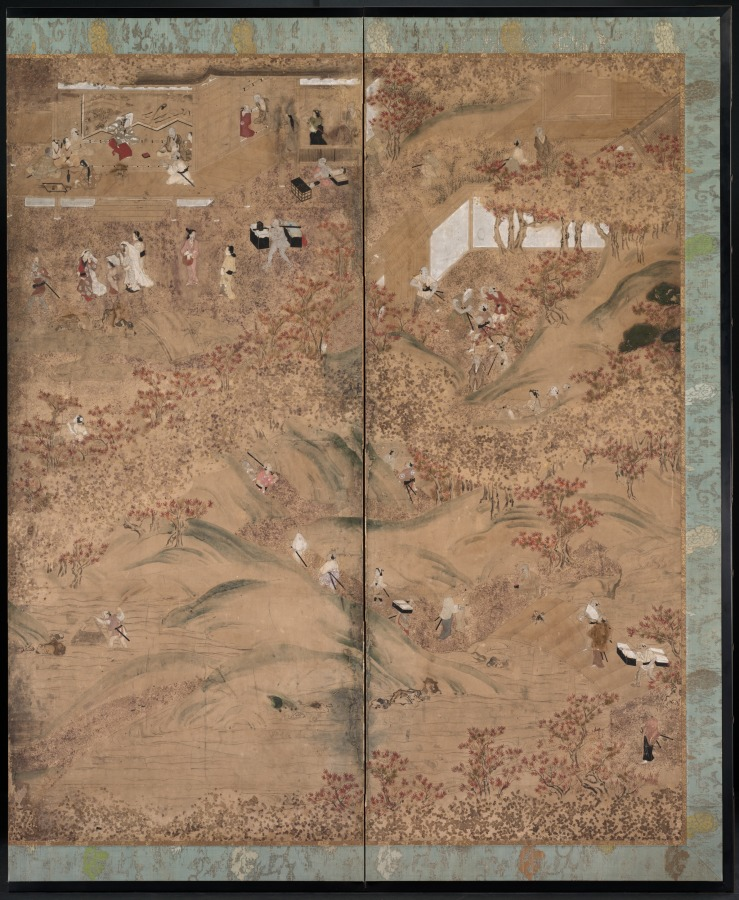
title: Autumn in the Mountains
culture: Japan, Edo period (1615–1868)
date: 1600s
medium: six-fold screen; ink and color with applied silver and gold leaf on paper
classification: Painting